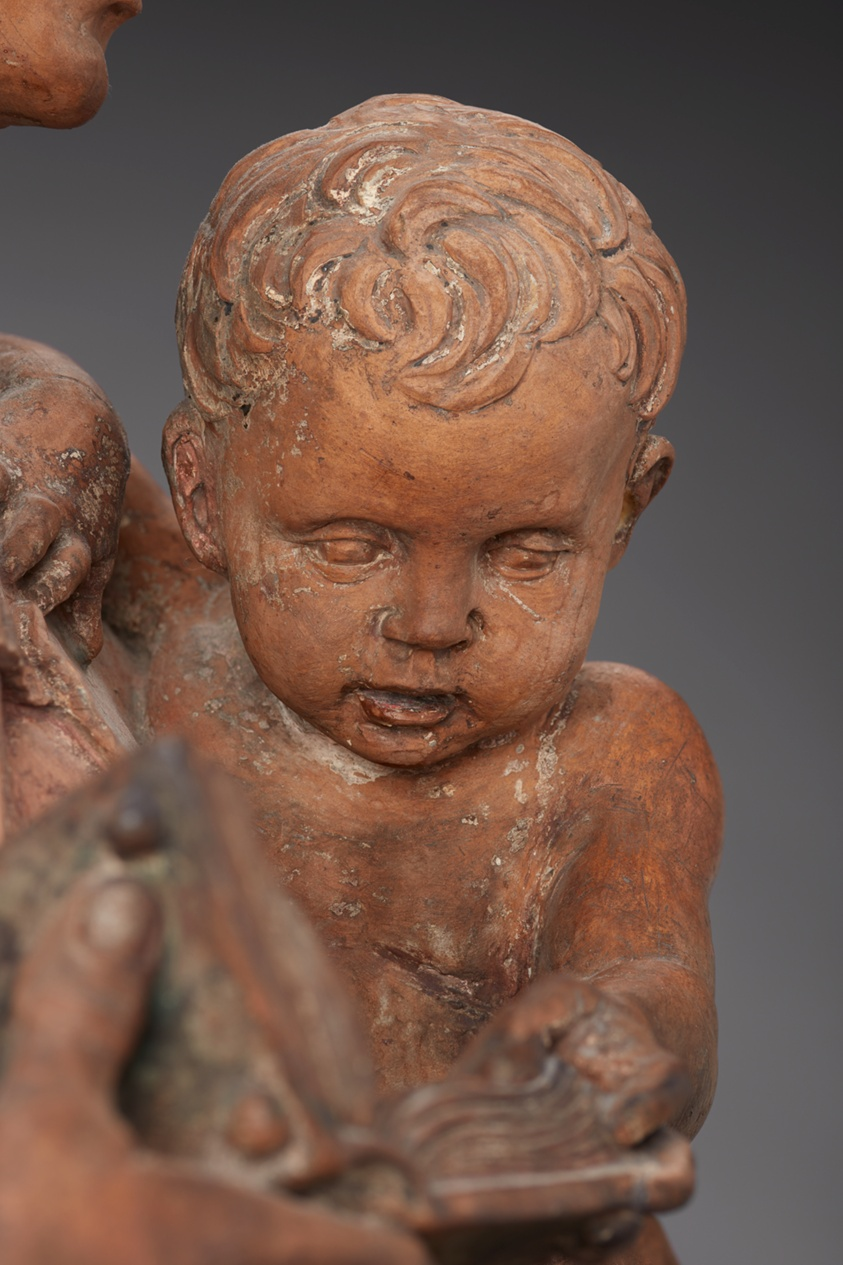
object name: Sculpture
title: Virgin and Child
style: sixteenth century, 16th Century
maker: Central Italian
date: c. 1500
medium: Pigmented terracotta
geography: Central Italy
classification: large scale; sculpture; Italian; terracotta (sculpture)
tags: Virgin and child/Madonna and child, Christianity, Christian subjects, religious figures, religious, religion, woman with children, woman, babies, child, mother and child, mother, Jesus, Virgin Mary